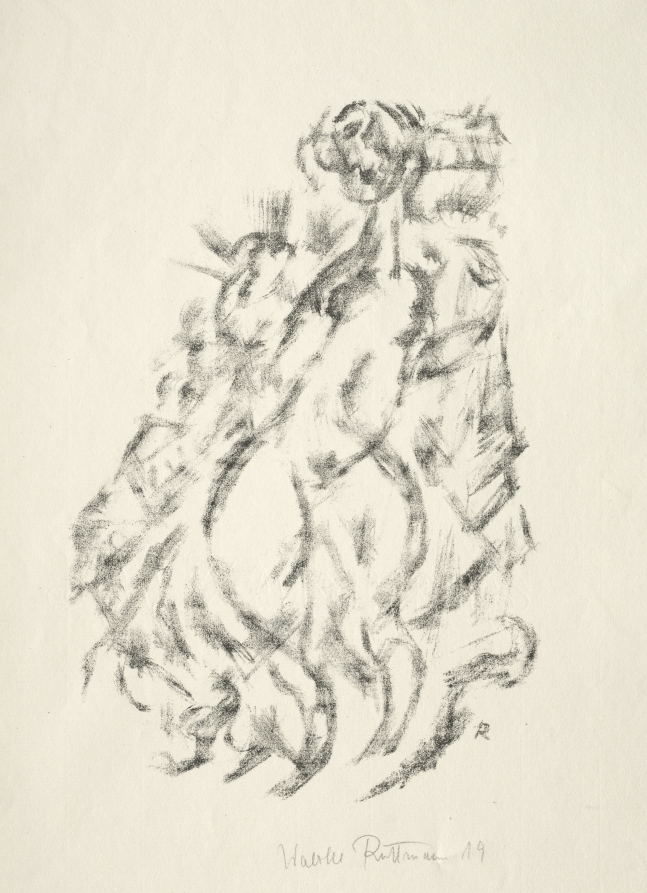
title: The Promenade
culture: Germany, 20th century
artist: Walter Ruttmann (German, 1887–1941)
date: 1919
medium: lithograph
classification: Print